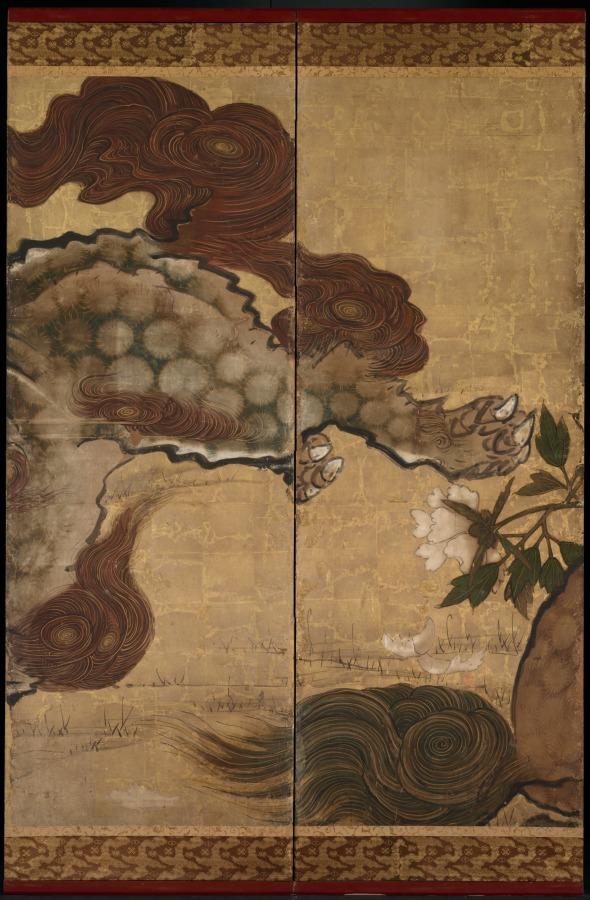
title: Lions and Tigers in Peony and Bamboo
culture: Japan, Edo period (1615–1868)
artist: Yamaguchi Sekkei (Japanese, 1644–1732)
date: 1668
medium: One of a pair of six-panel folding screens; ink and color on gilded paper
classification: Painting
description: Sekkei lived and studied painting in Kyoto at the Kano school studio, the center of traditional painting activity in Japan since 1500. The use of gold foil as a backdrop for the frolicking animals served a practical as well as a decorative function. Because traditional Japanese rooms had no windows, interior lighting came from portable oil lamps and wax candles, whose effects were magnified by reflective surfaces.